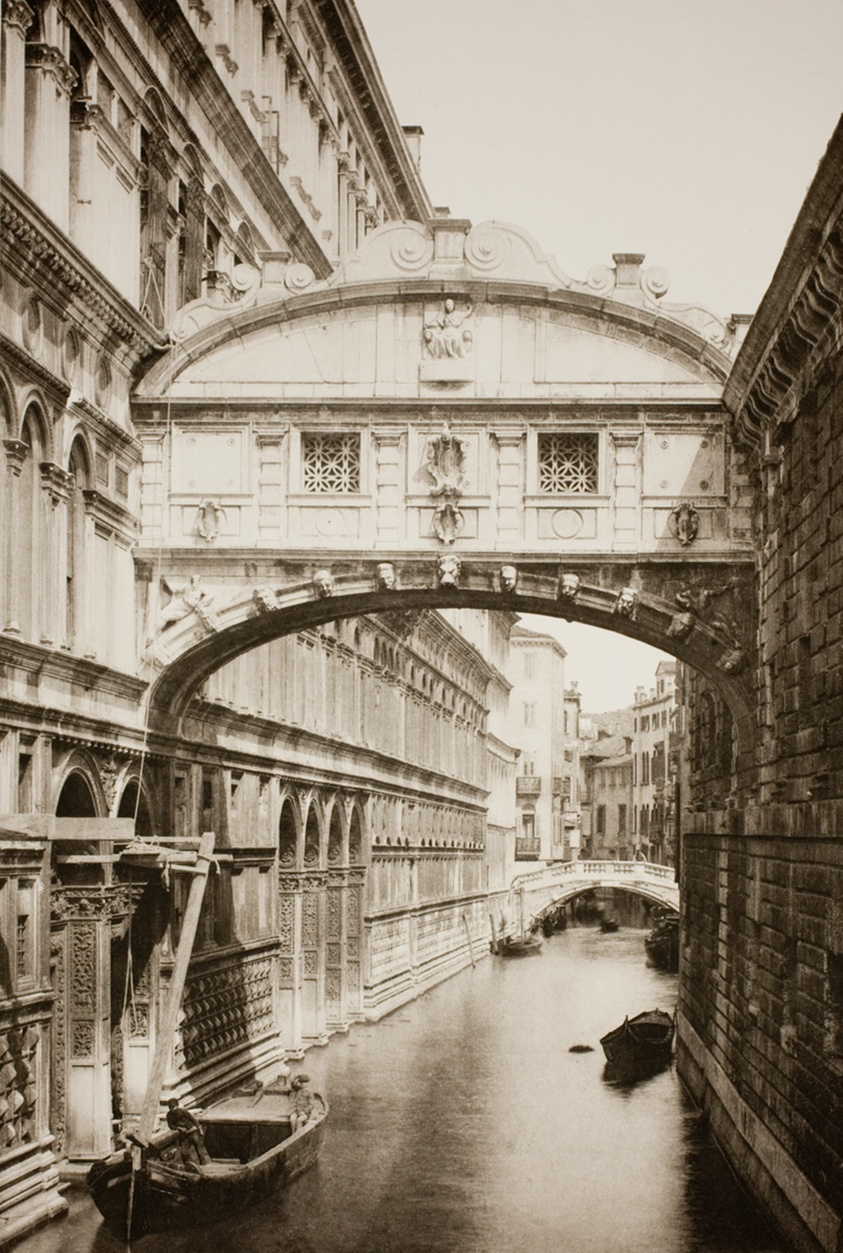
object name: Photograph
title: Untitled (27)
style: 19th century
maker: edited by Ferdinando Ongania; Italian, 1842–1911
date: c. 1890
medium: Photogravure, No. 39 from the portfolio "Calli, Canali e Isole della Laguna"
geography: Italy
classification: photograph; photography